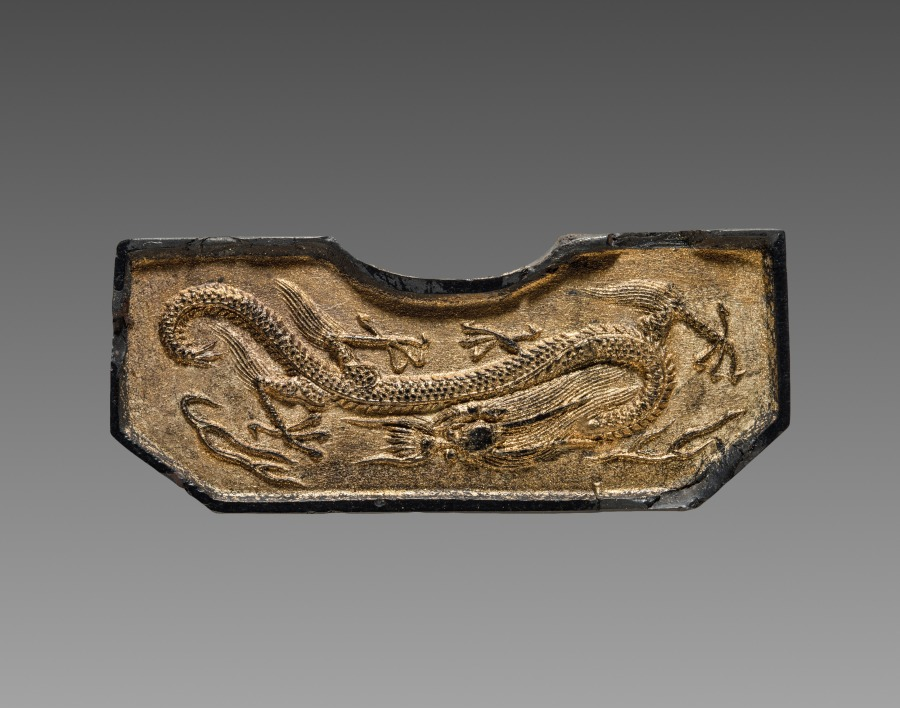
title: Ink Cake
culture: China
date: 1800s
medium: ink cake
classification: Miscellaneous